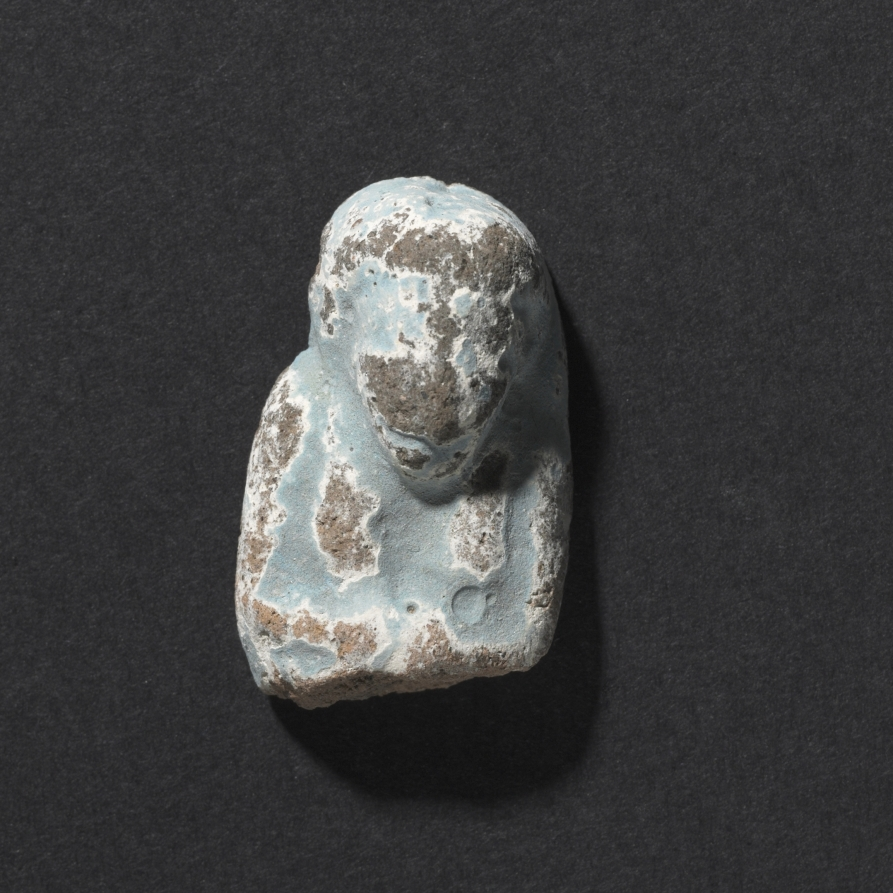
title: Shawabty of Ditamenpaankh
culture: Egypt, Late period (715–332 BCE), Dynasty 25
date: 715–656 BCE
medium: terracotta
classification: Funerary Equipment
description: High demand for shawabtys in the Late Period, a time when as many as 400 or more shawabtys were placed in the tomb with the deceased, gave rise to a specialized container for storing them: the shawabty box. This example is inscribed for the lady of the house, Ditamenpaankh, and was probably one of a pair originally made for her. The single-masted boat on the box's lid is perhaps an allusion to the pilgrimage of the deceased to the holy city of Abydos, the cult city of Osiris, king of the dead. The shawabtys inside are crude, mass-produced examples cast in an open mold. Made of terracotta, their blue paint imitates more costly shawabtys made of faience. As for the shawabty spell, it has been removed from its traditional location on the shawabty's front and relocated onto the sides of box, where it needed only to be written once, thus expediting production.